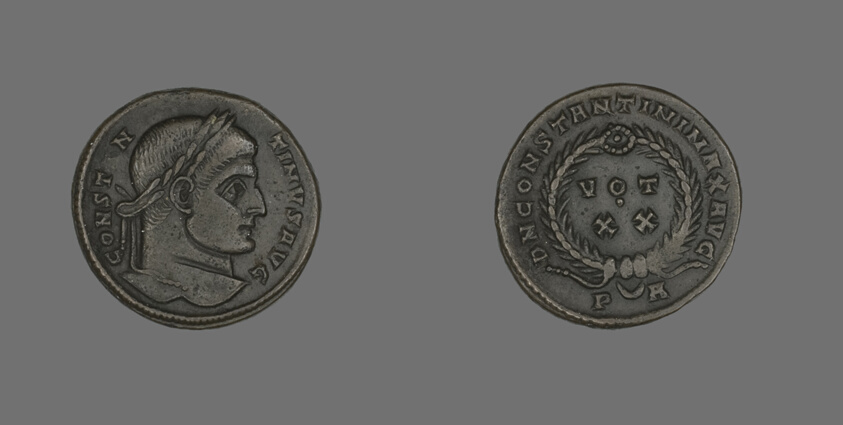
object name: Coin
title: Coin Portraying Emperor Constantine I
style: roman (ancient, style or period), ancient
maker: Roman, minted in Arles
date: 321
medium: Bronze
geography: Roman Empire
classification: coin; ancient art